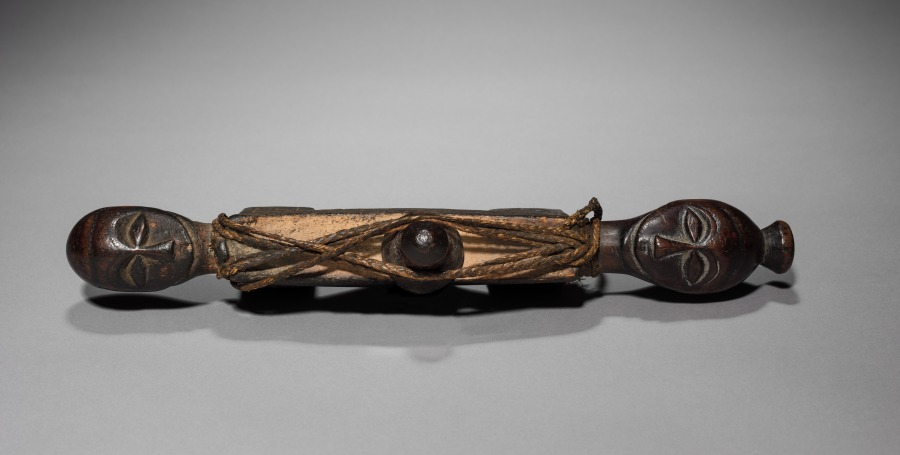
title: Divination Implement (itombwa)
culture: Africa, Central Africa, Democratic Republic of the Congo, Kuba-style maker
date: 1890–1910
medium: Wood and plant fiber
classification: Sculpture